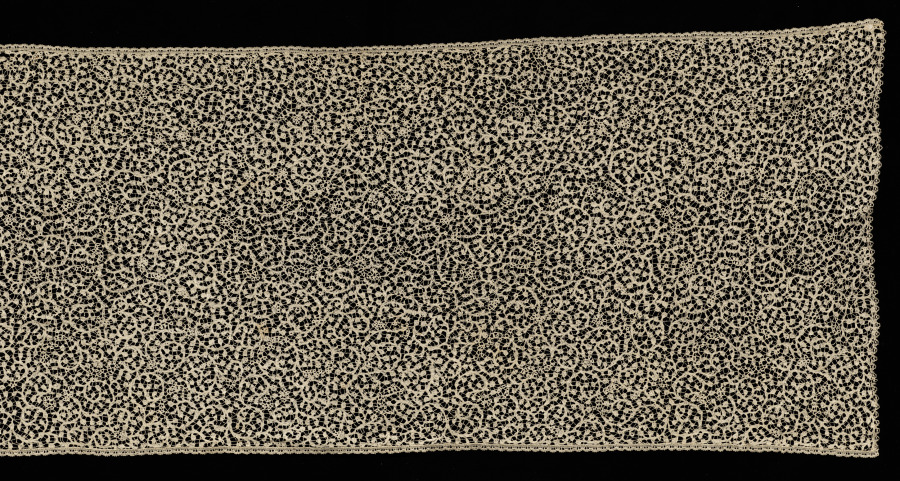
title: Lace Flounce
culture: Flanders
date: 1700s–1800s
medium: Linen: bobbin lace (resembles coralline point)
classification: Lace